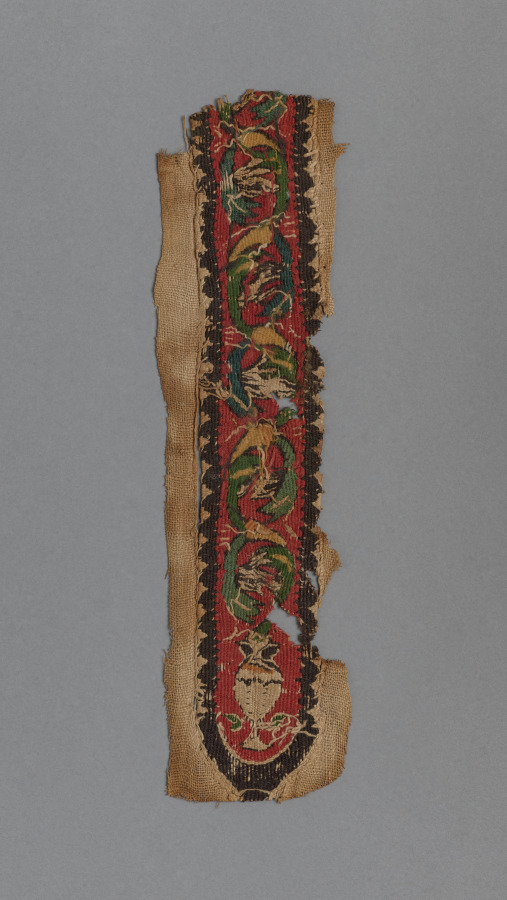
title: Fragment from a Tunic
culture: Egypt, 6th - 16th century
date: 500s - 1500s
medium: tabby weave with inwoven tapestry ornament, linen and wool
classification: Textile